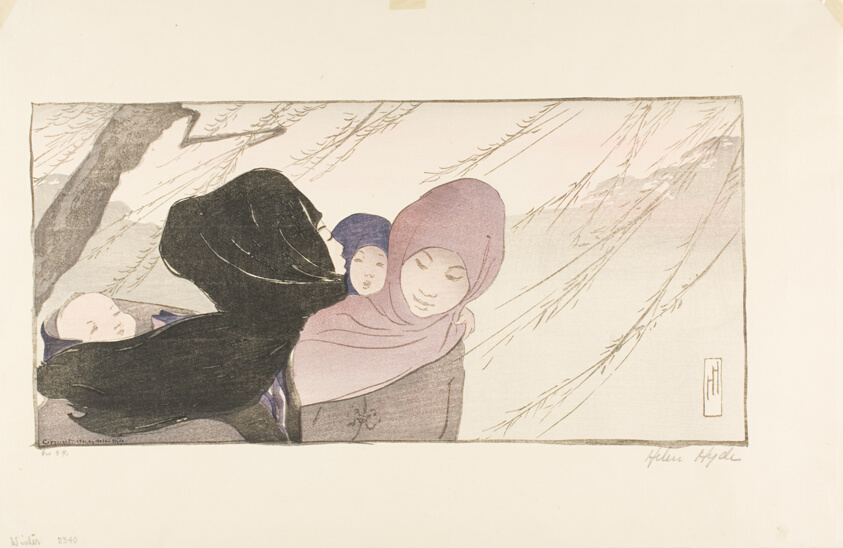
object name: Print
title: Winter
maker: Helen Hyde (American, 1868-1919)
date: 1901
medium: Color woodcut on paper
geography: United States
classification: woodcut; print; prints and drawing